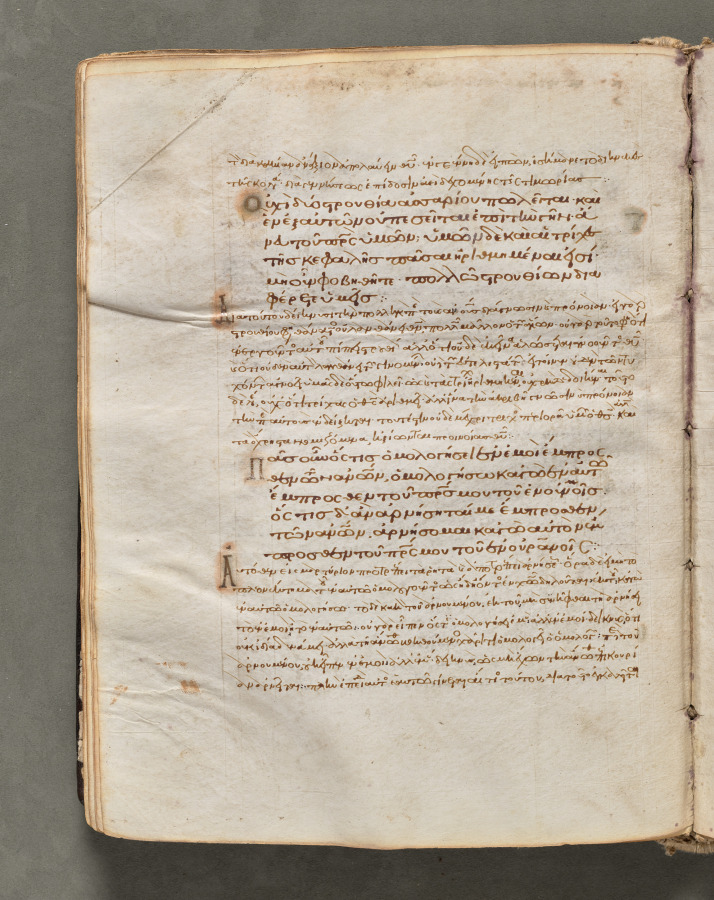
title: Text, folio 45 (verso), from a Gospel Book with Commentaries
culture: Byzantium, Constantinople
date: c. 1000–1100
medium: ink, tempera, and gold on vellum; leather binding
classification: Bound Volume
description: Each of the four gospels in this book opens on a page with brilliantly illuminated borders depicting the author of the text as well as birds-principally peacocks, symbols of the immortality of the soul-and fountains, representing the fountain of life and the salvation of the soul. This volume consists of 428 leaves with texts in Greek. Its level of sophistication suggests that it was probably written and decorated in a monastery in Constantinople.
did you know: Gospel Books were carried in procession through Byzantine churches.